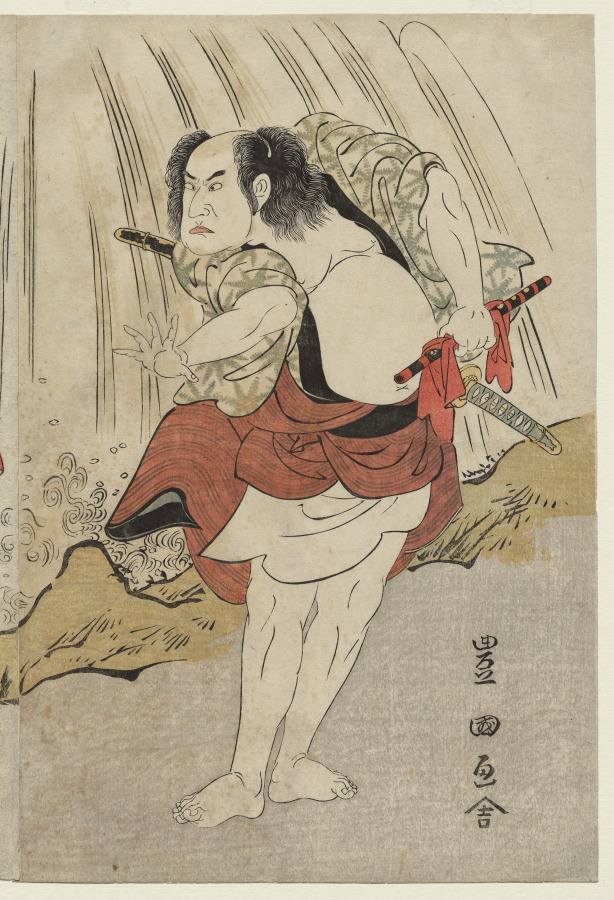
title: Kataoka Nizaemon VII and Ichikawa Yaozo III in a Confrontation Beside a Waterfall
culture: Japan, Edo period (1615–1868)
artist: Utagawa Toyokuni (Japanese, 1769–1825)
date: c. 1797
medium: color woodblock print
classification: Print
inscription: Signature: Toyokuni ga